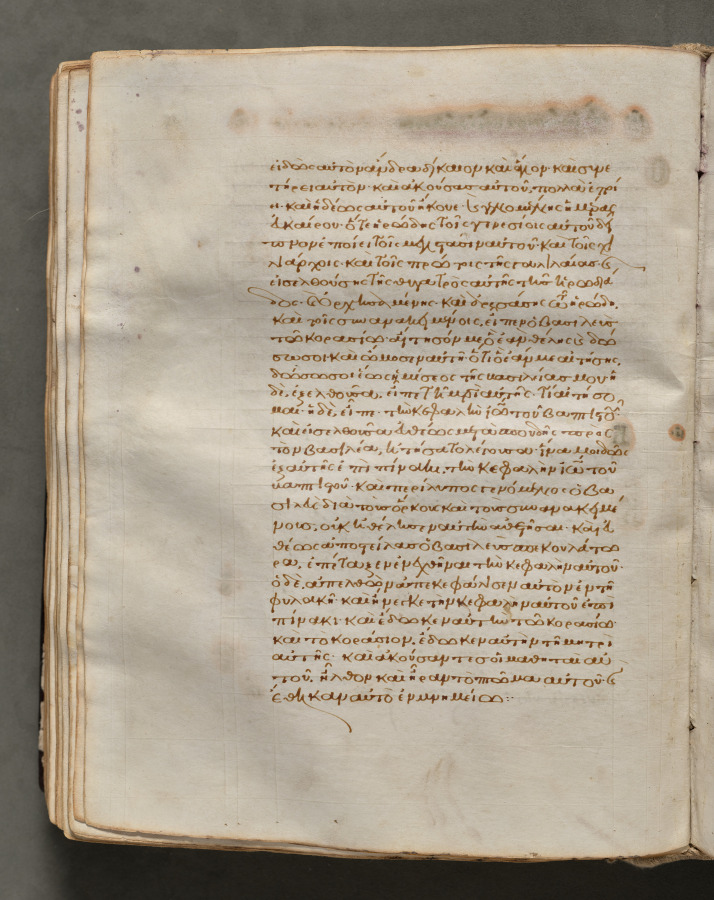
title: Text, folio 151 (verso), from a Gospel Book with Commentaries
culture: Byzantium, Constantinople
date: c. 1000–1100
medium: ink, tempera, and gold on vellum; leather binding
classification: Bound Volume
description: Each of the four gospels in this book opens on a page with brilliantly illuminated borders depicting the author of the text as well as birds-principally peacocks, symbols of the immortality of the soul-and fountains, representing the fountain of life and the salvation of the soul. This volume consists of 428 leaves with texts in Greek. Its level of sophistication suggests that it was probably written and decorated in a monastery in Constantinople.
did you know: Gospel Books were carried in procession through Byzantine churches.